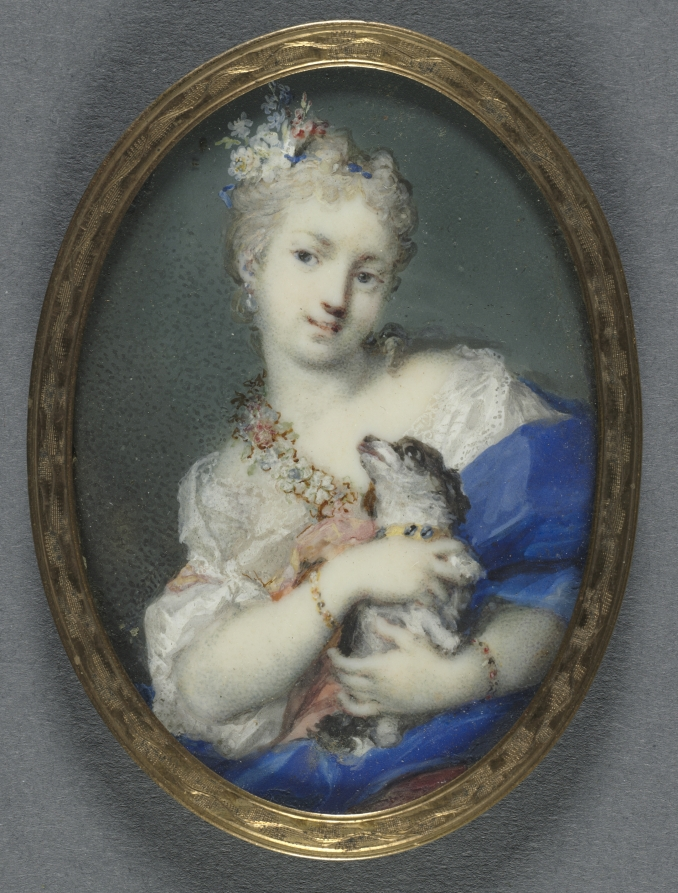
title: Woman with a Dog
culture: Italy, 18th century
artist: Rosalba Carriera (Italian, 1675–1757)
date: 1710–1720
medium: watercolor on ivory in a gilt metal mount with a saw-tooth enclosure at the back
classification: Portrait Miniature